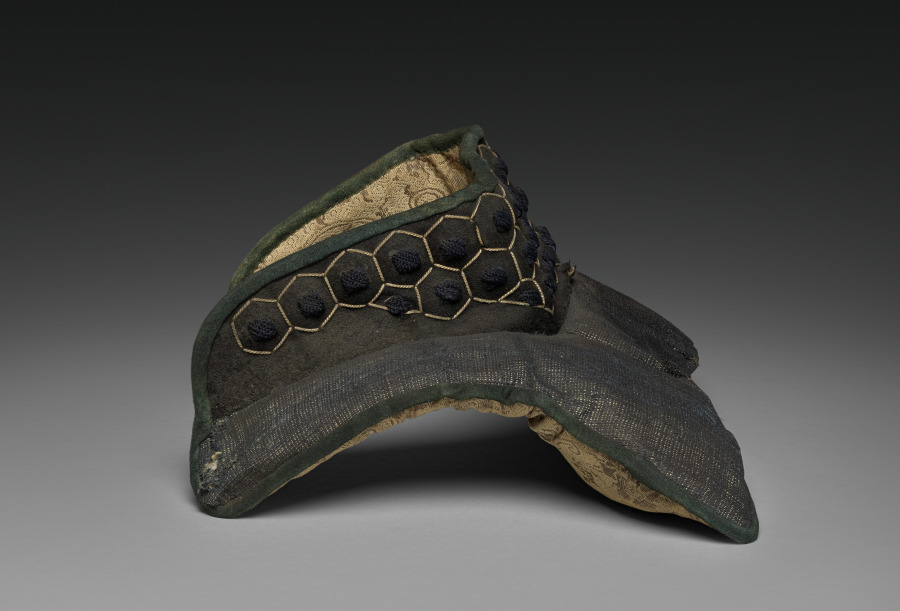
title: Collar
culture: Japan, Edo period (1615–1868)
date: 1600s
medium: Iron, lacquer, textile (silk)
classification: Arms and Armor